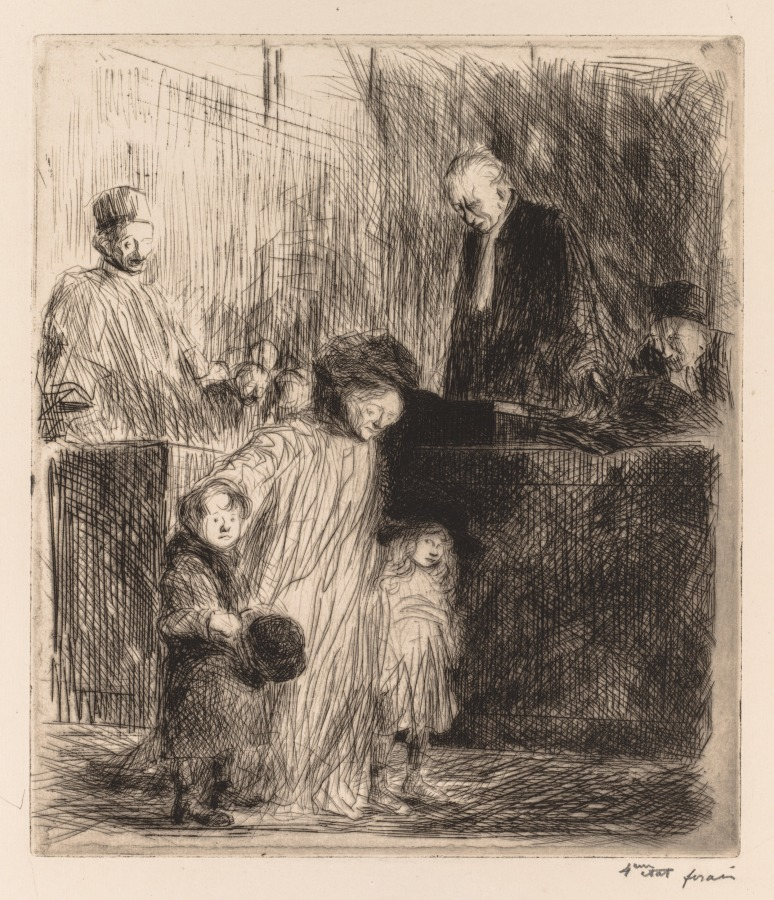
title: Sortie de l'Audience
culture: France, 19th-20th century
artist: Jean Louis Forain (French, 1852–1931)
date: 1909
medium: etching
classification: Print